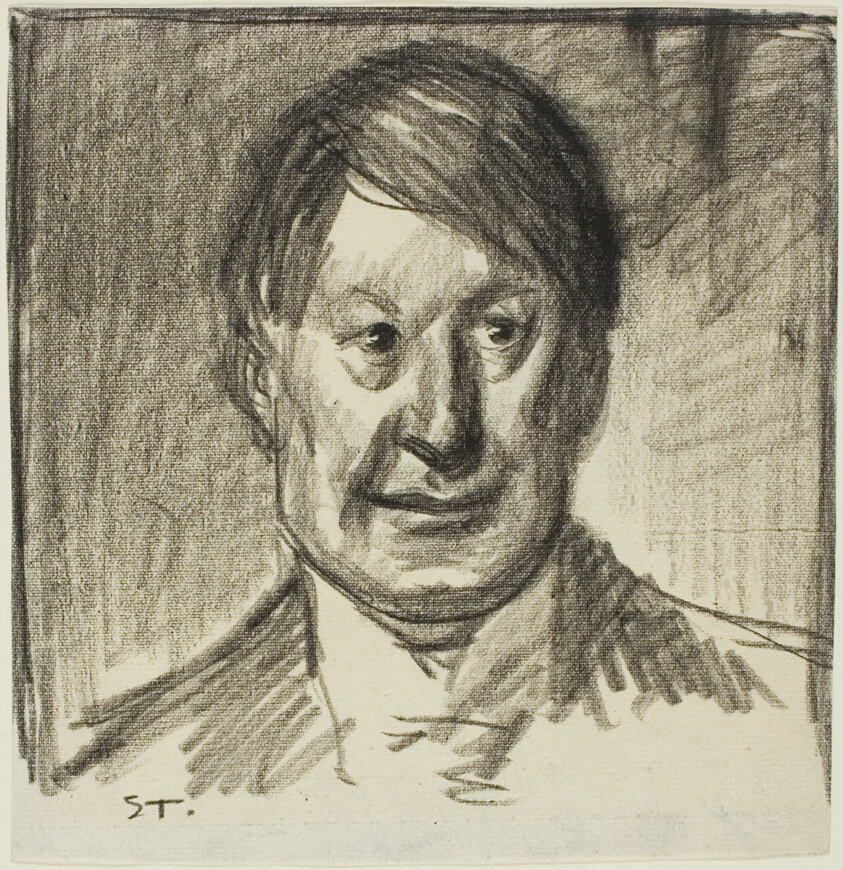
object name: Drawing and Watercolor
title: Jean Louis Forain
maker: Théophile-Alexandre Pierre Steinlen (French, born Switzerland, 1859-1923)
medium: Black crayon, on ivory laid paper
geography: France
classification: drawings (visual works); prints and drawing